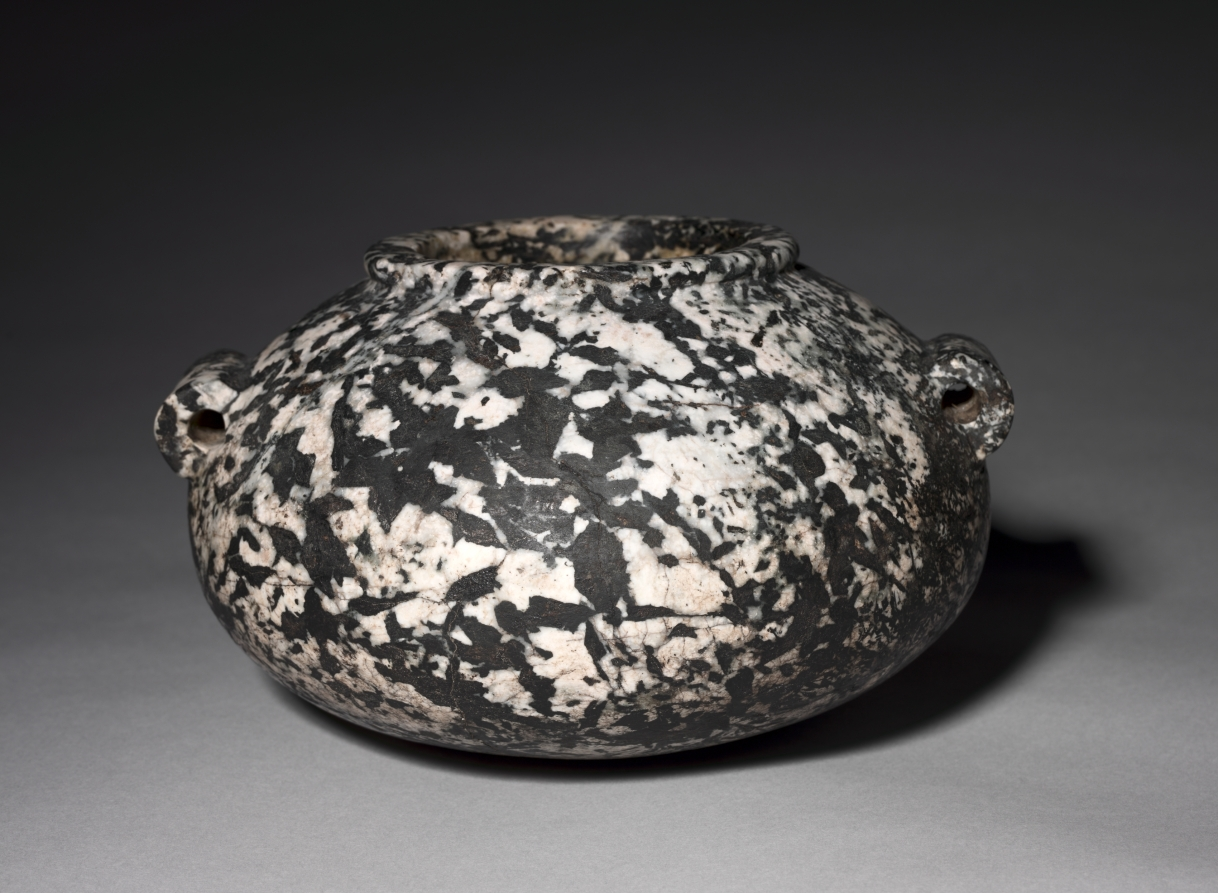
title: Squat Jar with Lug Handles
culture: Egypt, Early Dynastic (2950–2647 BCE), Dynasties 1–3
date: 2950–2573 BCE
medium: pegmatitic hornblende diorite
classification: Vessels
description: A single tomb might contain hundreds of stone vessels replicating the shapes of pottery vessels used in everyday life. The most popular material for stone vessels was white or banded travertine (Egyptian alabaster), found close to the Nile, but prospectors and quarrymen often traveled far in search of the desired materials. The hard stone hornblende diorite, notable for its mottled texture, was quarried in the desert along the route to the Red Sea.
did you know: The stone used for this vessel, a pegmatitic hornblende diorite whose white crystals contain a faint tint of pink, indicates it must have been considered a luxury item.